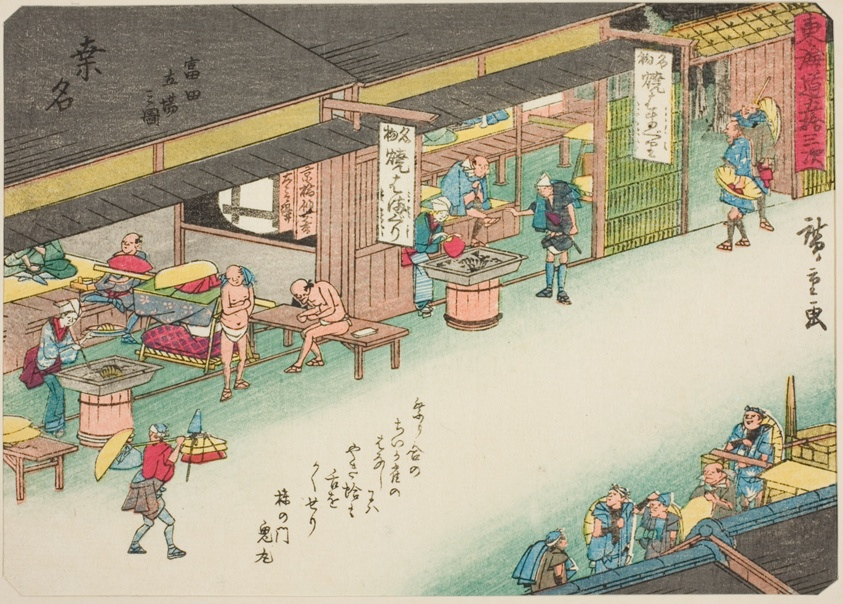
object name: Print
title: Kuwana: The Post Station at Tomita (Kuwana, Tomita tachiba no zu), from the series "Fifty-three Stations of the Tokaido (Tokaido gojusan tsugi)," also known as the Tokaido with Poem (Kyoka iri Tokaido)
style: Japanese (culture or style)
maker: Utagawa Hiroshige 歌川 広重; Japanese, 1797-1858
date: c. 1837/42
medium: Color woodblock print; chuban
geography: Japan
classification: woodblock print; print; asian art